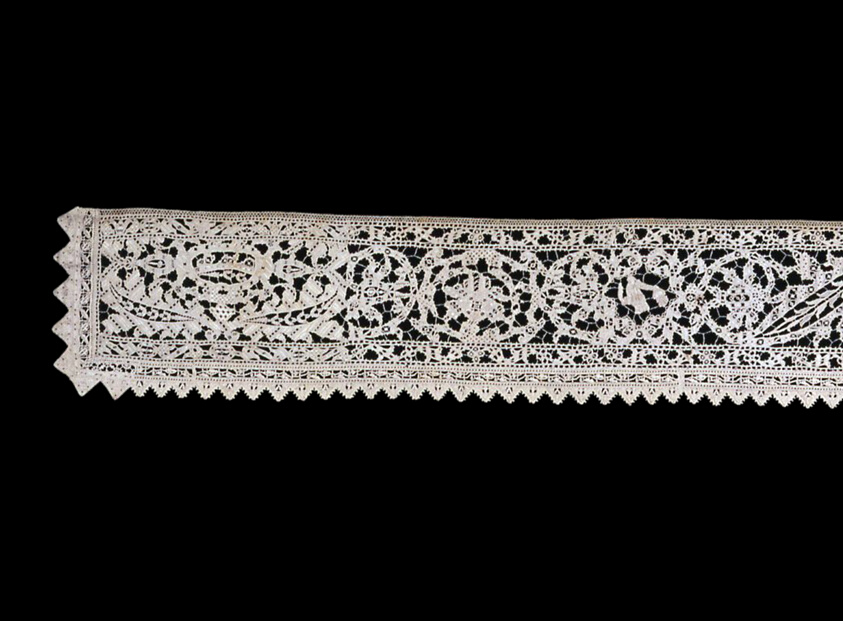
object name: Textile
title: Border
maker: Italy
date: Early 17th century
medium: Linen, plain weave; drawn work in bullion, buttonhole, double faggot, eyelet, hem, detached overcast, double overcast, overcast, satin, and stem stitches; cut work in buttonhole and interlocking lace stitches; buttonhole, double buttonhole, and overcast bars decorated with bullion, plaited and buttonhole collar picots (needle lace fillings); glass beads; heading (later in date): cotton, bobbin straight lace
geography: Italy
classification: textile; needlework (visual works)